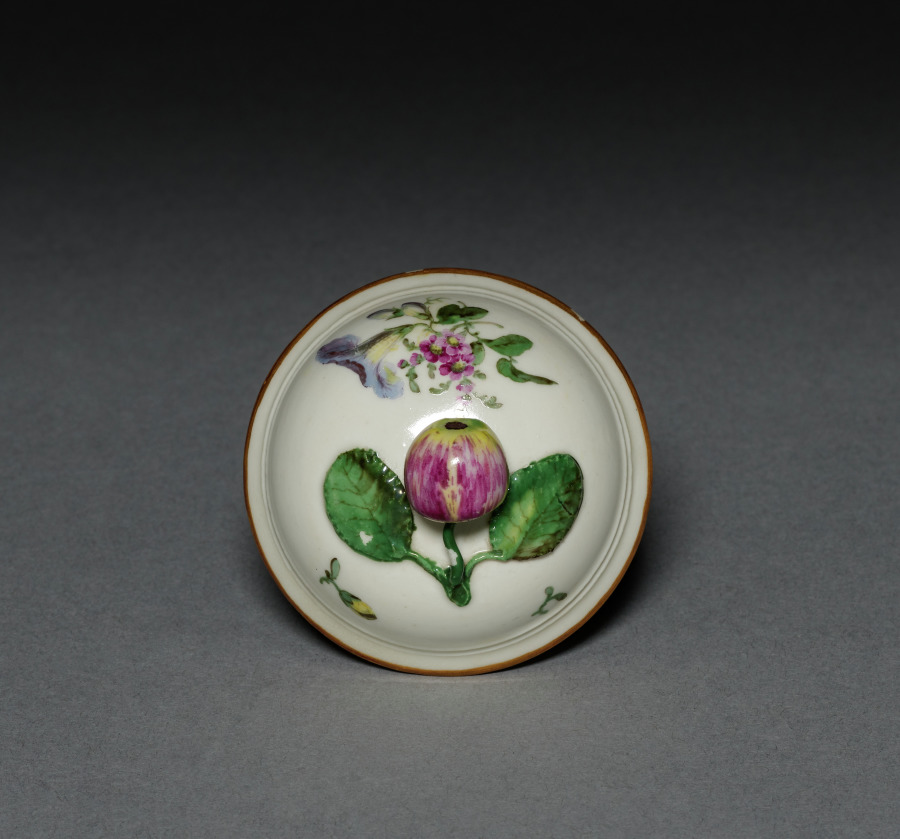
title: Teapot (lid)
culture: Germany, 18th century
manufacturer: Kloster-Veilsdorf Porcelain Factory (German)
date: late 1700s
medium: porcelain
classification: Ceramic